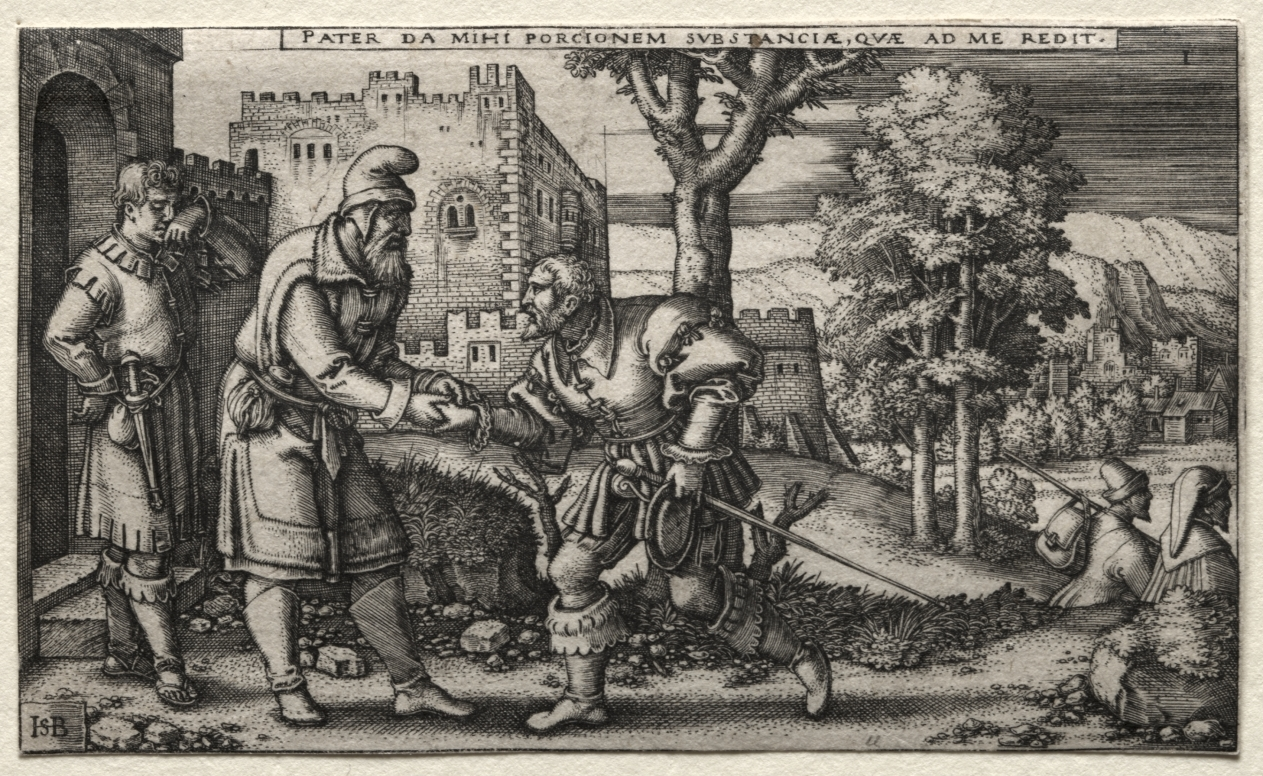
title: The Prodigal Son: Departure of the Prodigal Son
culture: Germany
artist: Hans Sebald Beham (German, 1500–1550)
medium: engraving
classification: Print